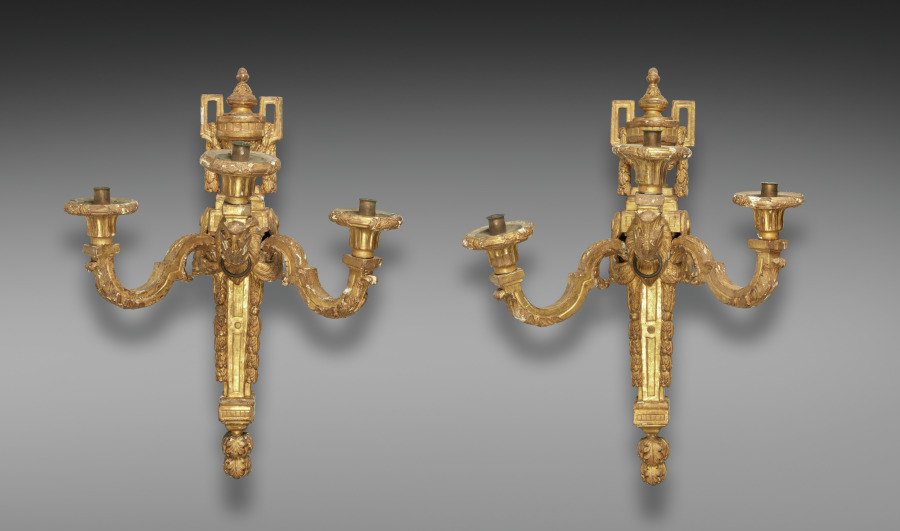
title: Pair of Candle Brackets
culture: France, style of Louis XVI, 18th century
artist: after a design by Jean Charles Delafosse (French, 1734–1789)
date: c. 1765–1775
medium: carved and gilded wood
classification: Furniture and woodwork